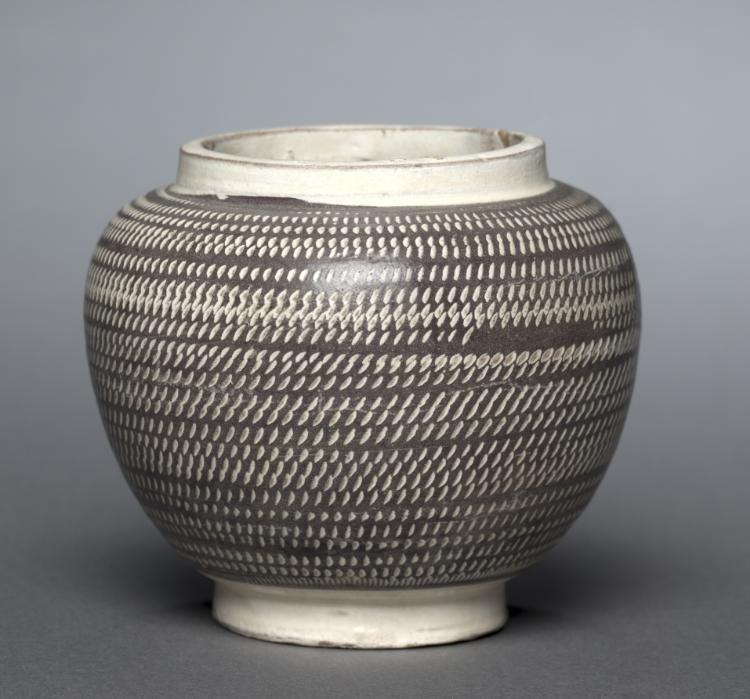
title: Jar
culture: Northern China, Northern Song (960-1127) or Jin dynasty (1115-1234)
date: 1100s-1200s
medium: glazed stoneware with roulette decoration, Cizhou ware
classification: Ceramic